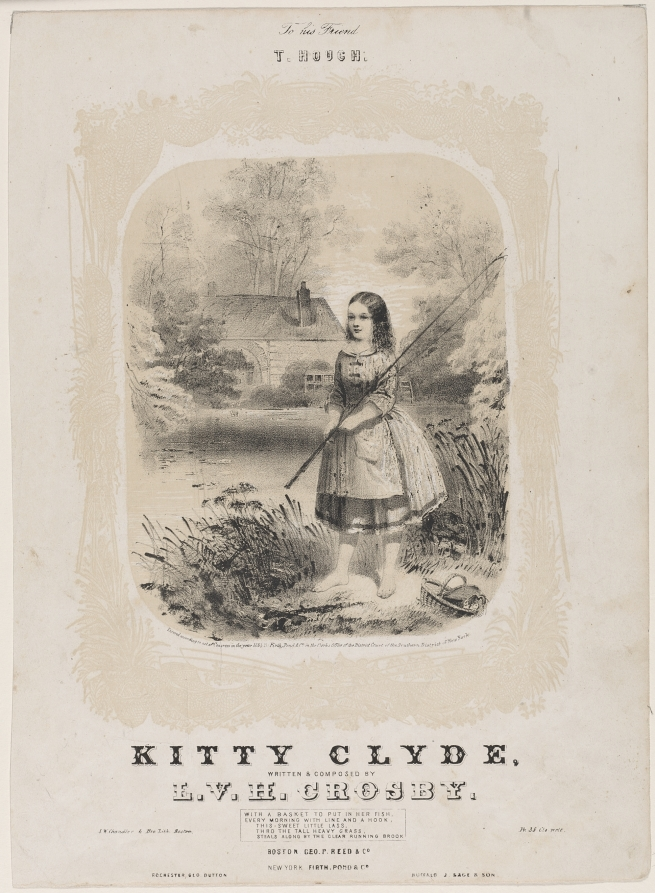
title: Kitty Clyde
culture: America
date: 1854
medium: lithograph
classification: Print